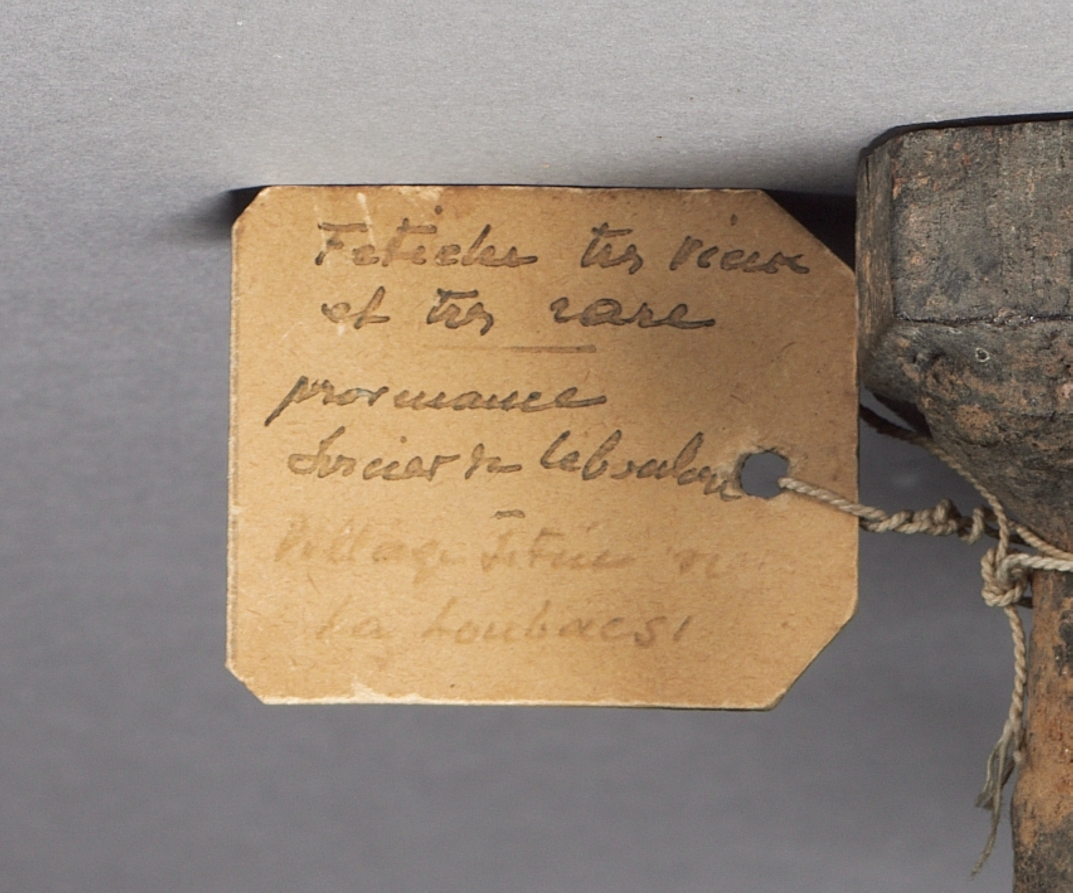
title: Power figure (nkisi)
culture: Africa, Central Africa, Republic of the Congo, Kongo-style maker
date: late 1800s-early 1900s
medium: Wood, metalized glass, organic materials (including resin), feathers, plant fibers, iron, and copper alloy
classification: Sculpture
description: One of seven minkisi figures previously in the René and Odette Delenne collection, this object contained medicines in which an ancestral spirit was believed to reside. This figure is one of the two tallest in the collection. Feathers of a bird of prey adorn its head, with two small guns pointing upward and a third hanging down. It had belonged to “the sorcerer of Louboulou.”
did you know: This is one of two tallest in the collection of spiritual figurines loaded with gunpowder to shoot at witches: nduda, or “night guns.”